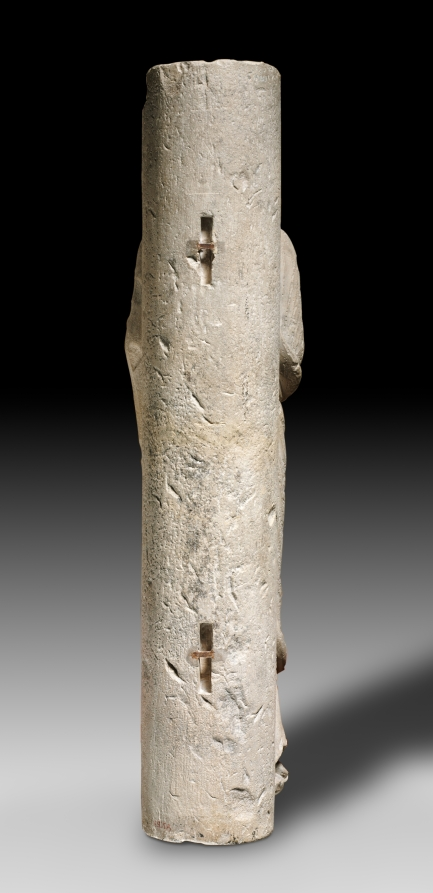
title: Columnar Figure of an Apostle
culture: France, Champagne, Châlons-sur-Marne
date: c. 1180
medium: limestone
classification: Sculpture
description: This figure of an apostle, probably Saint John the Evangelist, attached to its supporting column, came originally from the cloister of the Church of Notre-Dame-en-Vaux at Châlons-sur-Marne. A cloister was a covered walkway usually around all four sides of a square area of grass (the "cloister garth"). The seclusion of the cloister was the exclusive domain of the monks or clergy and off-limits to others. Here, the monks were able to pray, study, meditate, and exercise in privacy and solitude. This figure illustrates the transition in style from Romanesque to Gothic taking place in ecclesiastical buildings across northern France during the late 1100s.